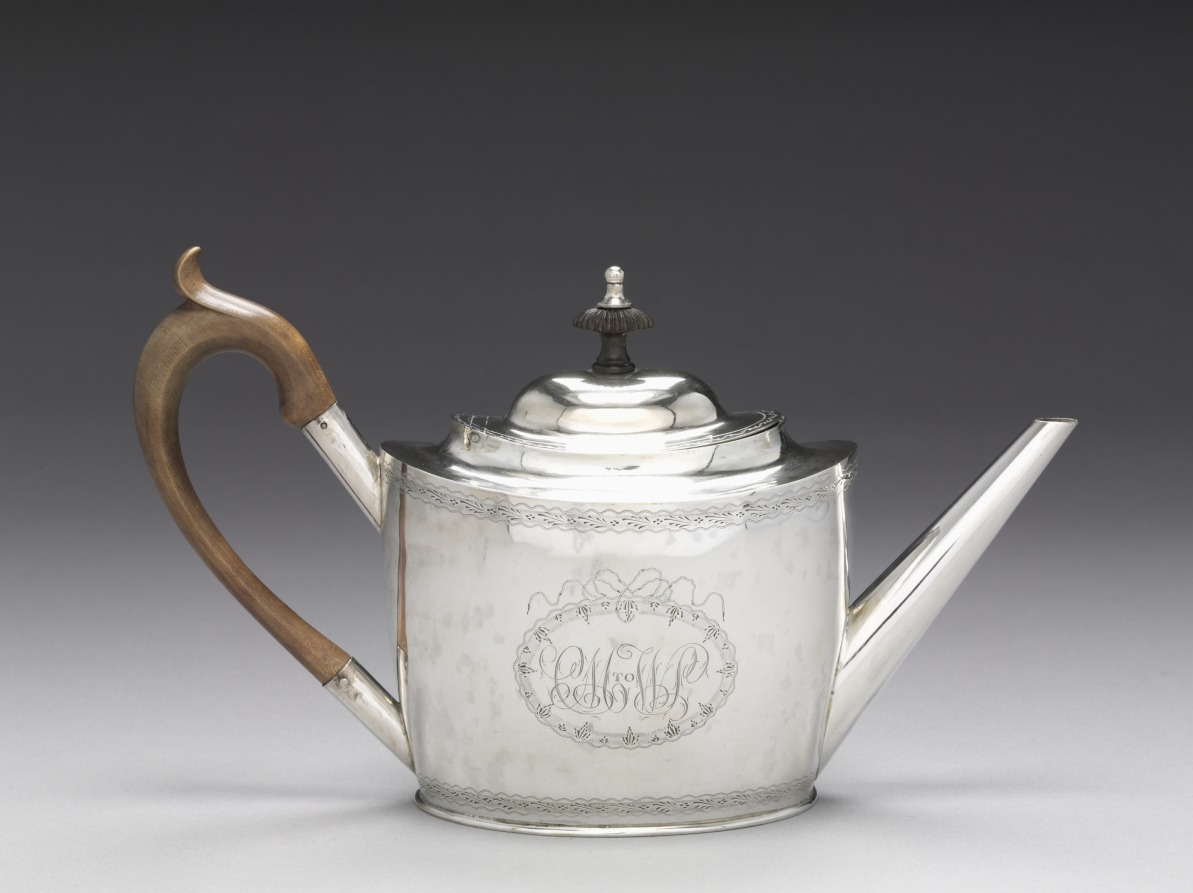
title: Teapot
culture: America, Massachusetts, Boston and Newburyport, late 18th-early 19th Century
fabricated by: Ebenezer Moulton (American, 1768–1824)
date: 1790–1810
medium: silver, wooden handle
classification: Silver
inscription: engraved: "CM TO WP" in bright-cut script within oval reserve on side to right of handle.